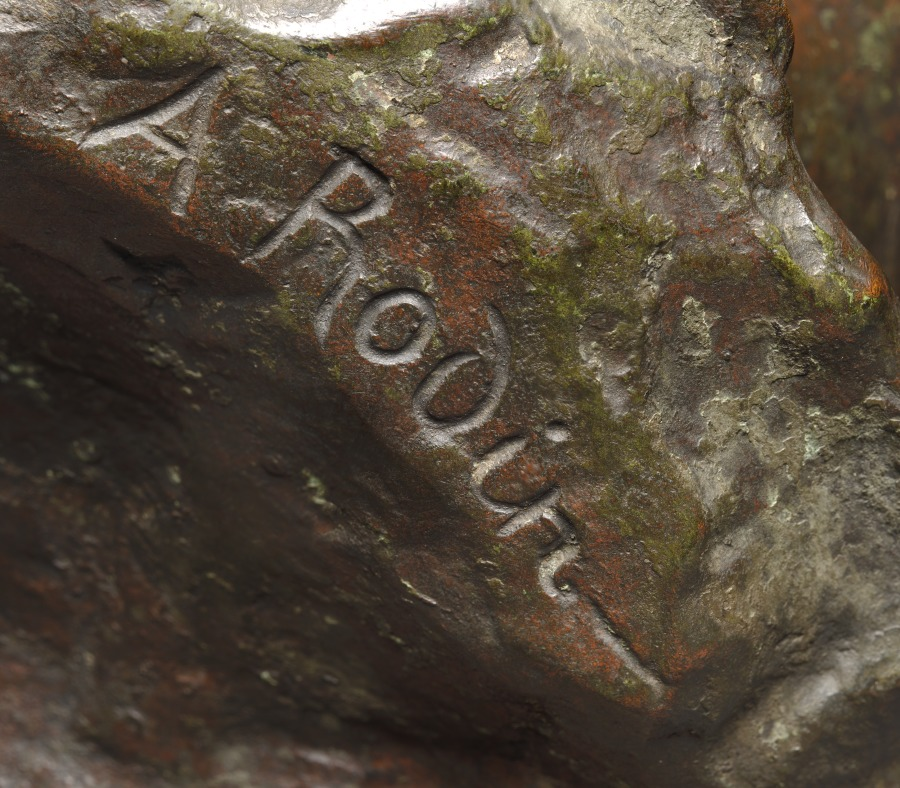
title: Bust of Victor Hugo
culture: France, 19th century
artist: Auguste Rodin (French, 1840–1917)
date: 1883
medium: bronze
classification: Sculpture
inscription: Signed beneath fold of drapery to left: "A. Rodin"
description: Unlike most of Rodin’s portraits, the bust of Victor Hugo (1802–1885) was made from memory because the famous French writer refused to sit for the artist. Among Hugo’s best-known novels are The Hunchback of Notre Dame (1831) and Les Misérables (1862).